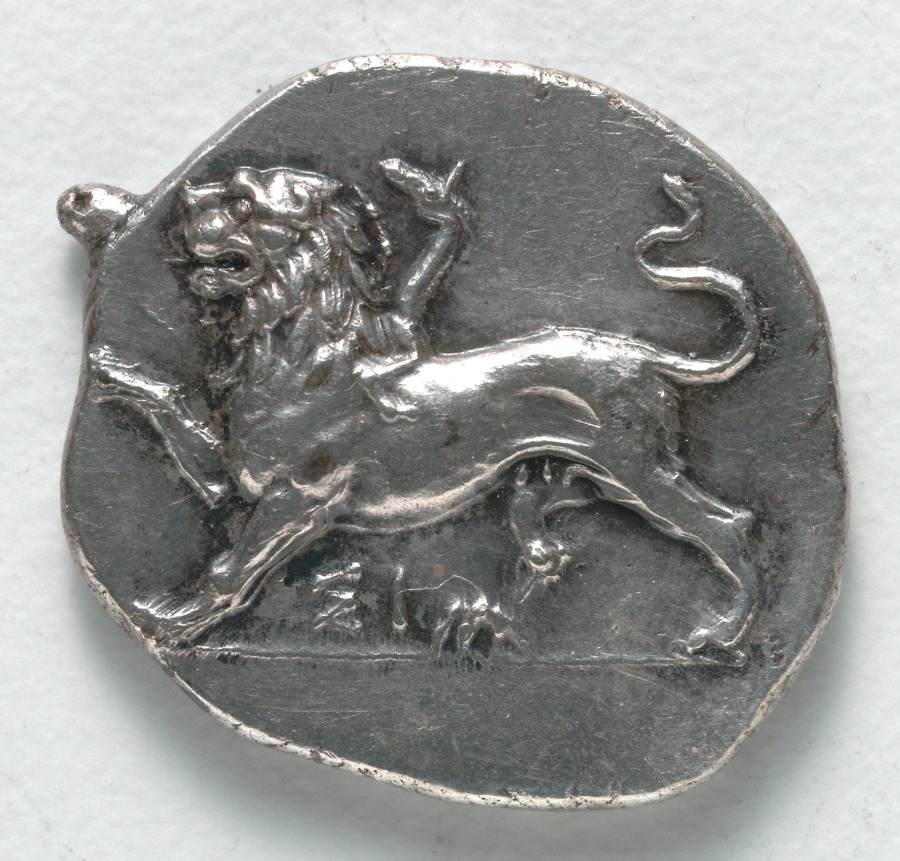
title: Hemidrachm: Chimaera (obverse); Dove (reverse)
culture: Greek, minted at Sikyon (Peloponnesos)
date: 400–323 BCE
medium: silver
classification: Coins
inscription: ΣΙ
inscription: I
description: The lion, king of the beasts and an animal associated with regal and heroic power, featured prominently on the coinage of many ancient Greek city-states. Artists placed the lion in a variety of poses, sometimes including the whole body, at other times the foreparts or just the head. Although it may once have roamed nearby, for many Greeks the lion was a monster nearly as exotic as the Chimaera, of which it formed a part (together with a goat head and snake-headed tail, as seen on this Sikyonian coin).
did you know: The monstrous chimaera adds a goat head and snake-headed tail to the already fearsome lion.